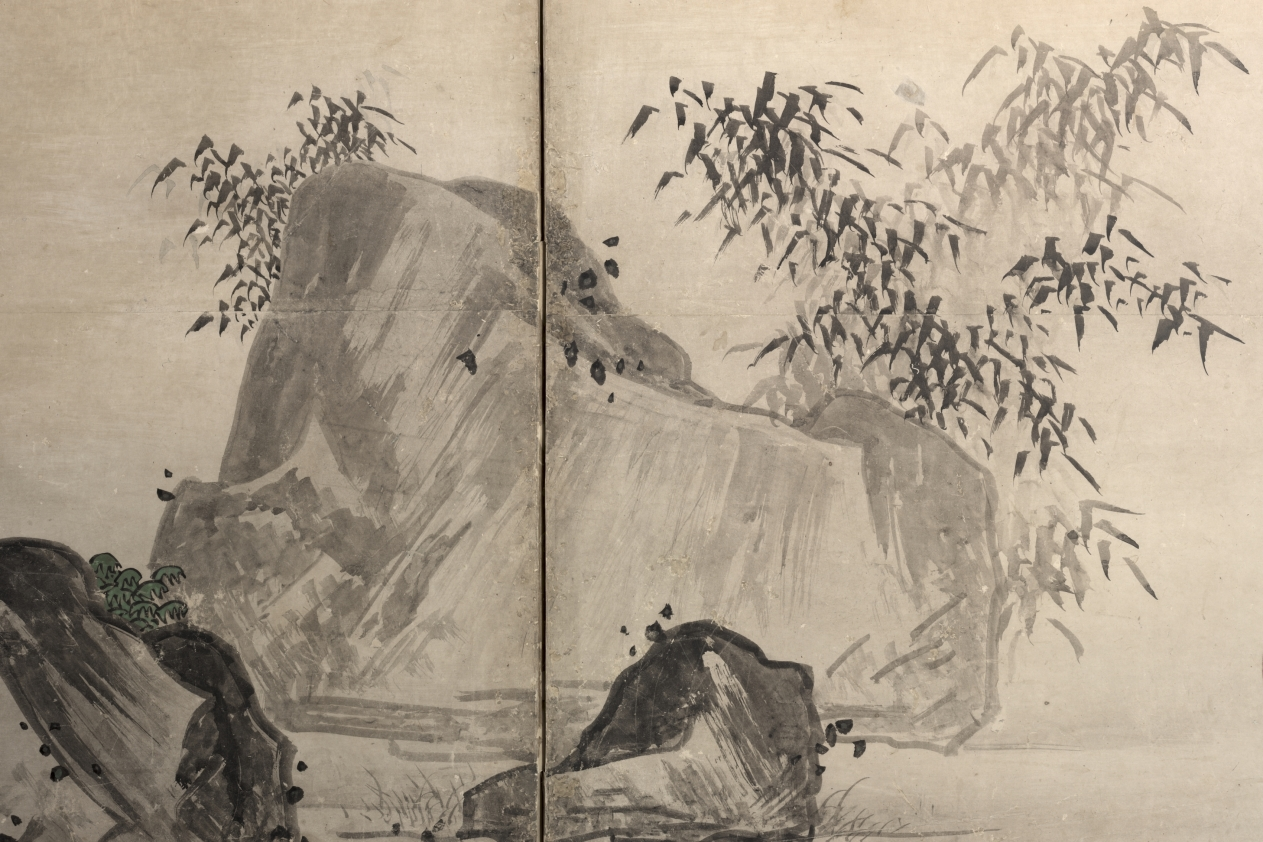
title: Su Shi (So Shoku)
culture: Japan, Momoyama period (1573–1615)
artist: Unkoku Tōgan (Japanese, 1547–1618)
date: early 1600s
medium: one of a pair of six-panel folding screens; ink, light color, and gold on paper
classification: Painting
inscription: Each screen in the pair is impressed with two seals arranged vertically, a round "Unkoku" seal above and square "Togan" seal below.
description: This pair of screens depicts episodes from the stories of famed Song-dynasty poets Su Shi of the 1000s and Zhou-dynasty official Pan Lang of the 900s. Both men were banished by their rulers for their perceived missteps. Su Shi’s comments on a series of economic reforms were seen as criticism of the emperor. Pan Lang composed an ill-advised verse about one of the king’s horses. In the left screen Pan rides backward on his donkey as he returns from exile so that he may have a last look at his now beloved Mount Hua. Su Shi, in the right screen, is shown embarking on his journey into exile. The artist of these screens, Unkoku Tōgan, was the founder of the Unkoku school of painting, which emulated the style of renowned ink painter Sesshū Tōyō (1420–1506). Tōgan was the official painter of the Mori family of what is now Yamaguchi prefecture in the south of Japan.